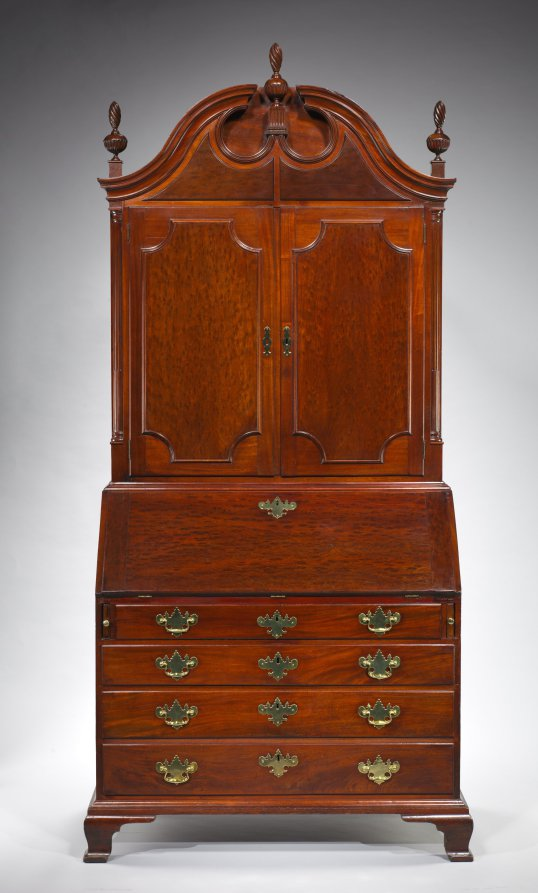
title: Desk and Bookcase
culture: America, Rhode Island, Newport, 18th century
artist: attributed to John Townsend (American, 1732–1809)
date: c. 1780–95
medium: "Plum pudding" mahogany, red cedar, chestnut, white pine, brass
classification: Furniture and woodwork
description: In the 1700s, Newport, Rhode Island, was the fifth largest city in North America and one of the most important centers of shipping and trade along the Eastern Seaboard. Orders for furniture from its celebrated cabinetmakers came in from far and wide. This desk and bookcase was likely made for Oliver Wolcott Sr., a signer of the Declaration of Independence and later governor of the State of Connecticut. Eventually, the desk passed down through his family to Dorothy Draper, an important 20th-century interior decorator, and ultimately to her daughter, Penelope Draper Buchanan, whose husband gave it to the museum after her death—a rare, unbroken line of succession. Large desks were designed to hold all the necessary components of a gentleman’s office under lock and key: books, papers, pens and ink, and important documents. To serve such a function desks also became complicated masterworks of the cabinetmaker’s art, incorporating many parts from small drawers to large panels cut from a single tree, making them among the most expensive types of furniture available. This desk and bookcase exhibits the characteristic traits of classic Newport furniture—“plum pudding” mahogany, cupcake-like finials, and a carved shell on the inside of the desk.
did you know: This desk and bookcase was likely made for Oliver Wolcott Sr., a signer of the Declaration of Independence and later governor of Connecticut.